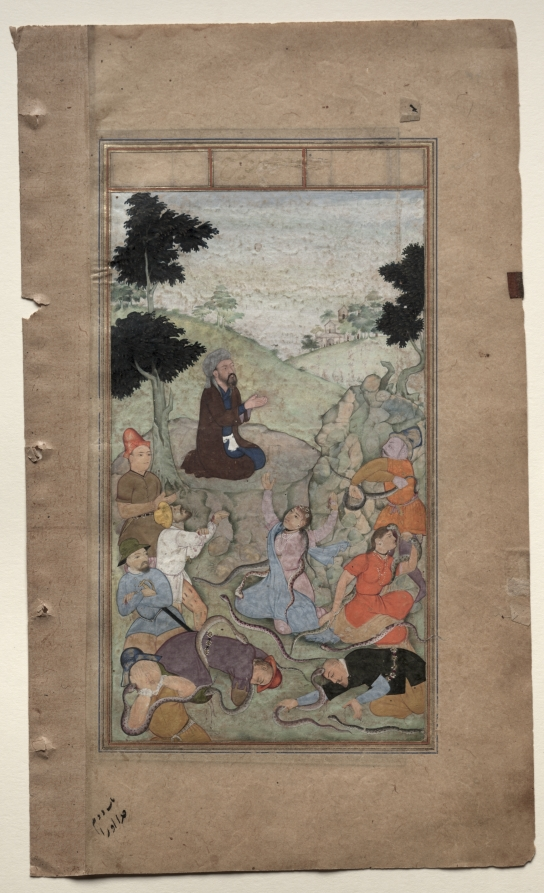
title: Moses praying to end the serpents’ attack on the Israelites (folio 63 verso), from a Mirror of Holiness (Mir’at al-quds) of Father Jerome Xavier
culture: Mughal India, Allahabad, made for Prince Salim (1569–1627)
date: 1602–4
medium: Gum tempera, ink, color, and gold on paper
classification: Manuscript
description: After the Israelites complained about the difficulties of their journey out of Egypt, God punished them for their lack of gratitude by sending snakes to bite and plague them. Apparently reveling in the brutality of the scene, the artist shows men and women alike being savaged by snakes, one of whose tail slithers over the rulings of the right margin. An Israelite woman raises her hands and pleads with Moses to help them, promising repentance, and he intercedes on their behalf. Father Jerome used this episode to demonstrate how repentant believers merit salvation.